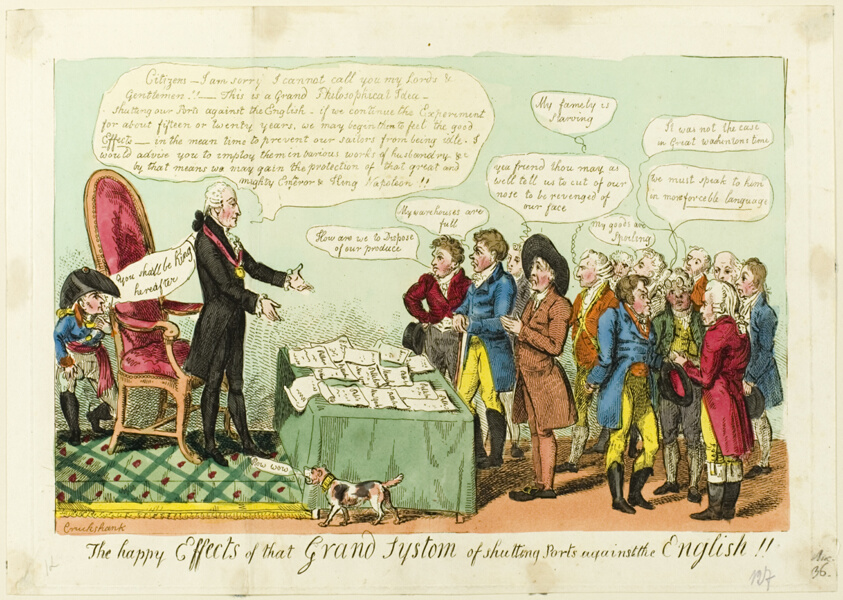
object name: Print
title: The Happy Effects of that Grand System of Shutting Ports Against the English!!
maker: Isaac Cruikshank (English, 1764-1811)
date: published October 1, 1808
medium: Hand-colored etching on paper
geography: England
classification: etching; print; prints and drawing